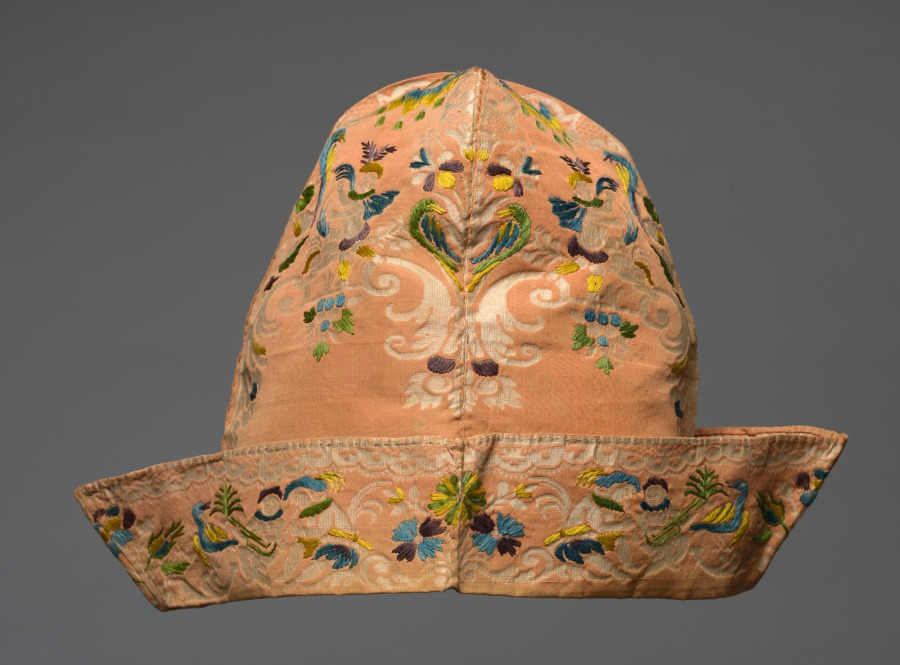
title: Man's Cap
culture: France, 18th century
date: 1700s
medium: brocade, silk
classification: Garment